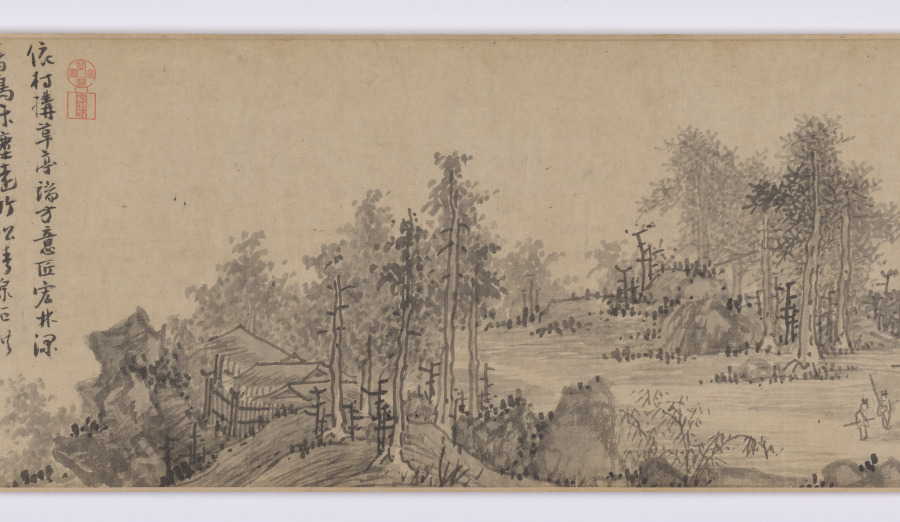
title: Poetic Feeling in a Thatched Pavilion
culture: China, Yuan dynasty (1271-1368)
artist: Wu Zhen (Chinese, 1280–1354)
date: 1347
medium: handscroll; ink on paper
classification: Painting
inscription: 依村構草亭，端方意匠宏。 林深禽鳥樂，塵遠竹松輕。 泉石俱延賞，琴書悅性情。 何當謝凡近，任適慰平生。 至正七年丁亥冬十月，為元澤戲作草亭詩意。梅沙彌書 [印]楳華盦; 嘉興吳鎮仲圭書畫記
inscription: 我愛梅花翁，巨老傳心印。 脩此水墨缘，種種得蒼潤。 樹石墮筆鋒，造化不能吝。 而今橡林下，我願執掃汛。 後學沈周 [印]启南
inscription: Colophon by Chen Rentao (1952): 予求梅道人畫二十年不可得。所見多膺鼎，即故宮所藏山水數軸都不可靠。傳世真迹，惟《漁父圖》、《嘉禾八景》與此《草亭詩意》而已。壬辰十月十四日余大病初愈，居家休養，研山師忽持此圖相贈。展卷披覽，頓覺精神沛振，如服僊藥。同日又得宋拓柳公權《神策軍紀聖德碑》，及群玉堂藏《真草書千(字)文》，皆海內孤本。一日得數寶，欣喜何如，書以志幸。 陳仁濤識 [印]陳氏仁濤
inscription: Colophon by Chen Rentao: 此圖作於至正七年丁亥，時年六十八，盖其晚年神品也。 濤又識 [印]陳仁濤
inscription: Title on frontispiece by Li Dongyang 李東陽 (1447-1516).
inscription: 33 additional seals: 1 seal of Li Chao-heng 李肇亨 (1592-1664)：檇李李肇亨書畫記; 9 seals of Liang Qingbiao 梁清標 (1620-1691): 蒼巖子、蕉林、蕉林梁氏書畫之印、蕉林秘玩、蕉林書屋、蕉林玉立氏圖書、棠邨 (appears twice)、棠邨審定; 1 seal of Wang Yirong (1845-1900): 懿榮; 3 seal of Li Yanshan (1898-1961): 雙銕笛樓 (appears twice)、硯山心賞; 12 seals of Chen Rentao 陳仁濤（1906-1968）：陳氏仁濤、陳仁濤珍藏印、金匱寶藏·陳氏仁濤 (appears three times)、金匱秘笈、金匱室、金匱室精鑒璽 (appears twice)、金匱室主、金匱神品、仁濤奇緣; 1 seal: 崐溟居士; 1 seal: 林止在㭯生圖書印; 3 seals unidentified.